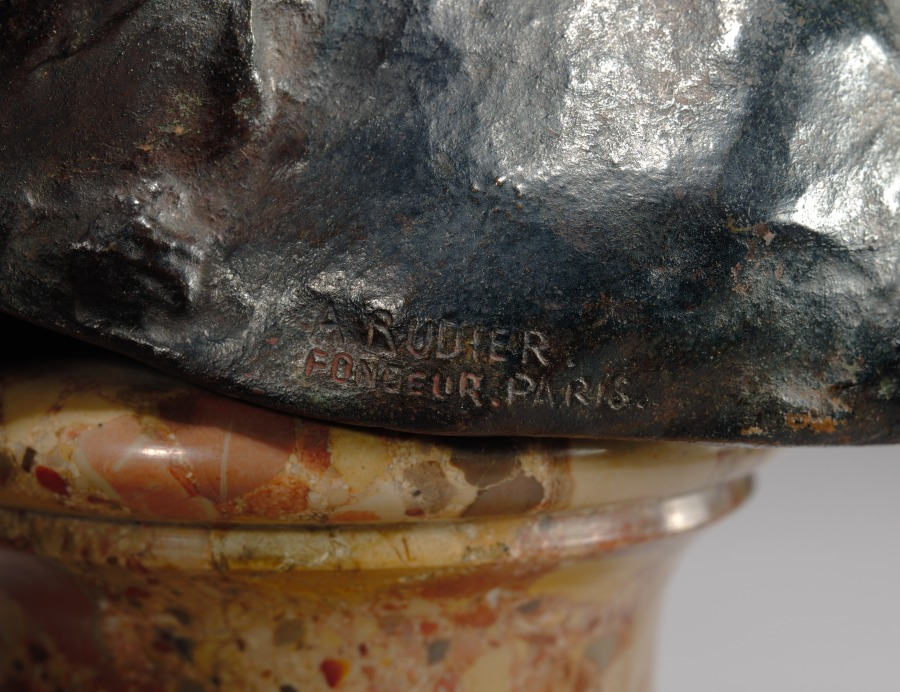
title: Head of the Little Martyr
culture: France, late 19th-early 20th century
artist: Auguste Rodin (French, 1840–1917)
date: c. 1880 – 1885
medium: bronze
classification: Sculpture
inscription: Signed sinister side: "A. Rodin"; inside front in relief: "A. Rodin"